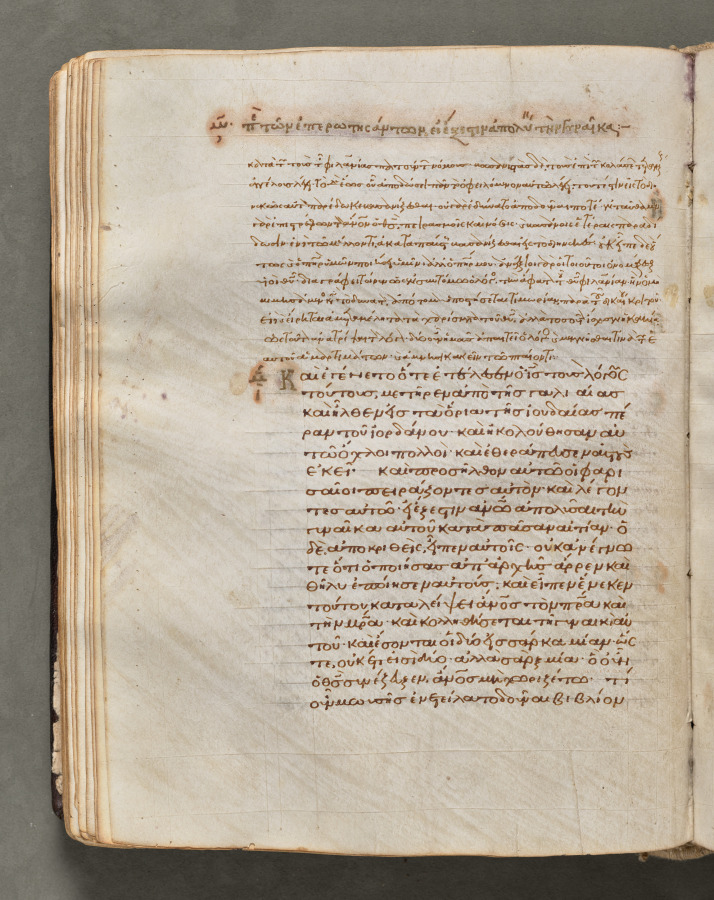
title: Text, folio 83 (verso), from a Gospel Book with Commentaries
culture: Byzantium, Constantinople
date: c. 1000–1100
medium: ink, tempera, and gold on vellum; leather binding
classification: Bound Volume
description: Each of the four gospels in this book opens on a page with brilliantly illuminated borders depicting the author of the text as well as birds-principally peacocks, symbols of the immortality of the soul-and fountains, representing the fountain of life and the salvation of the soul. This volume consists of 428 leaves with texts in Greek. Its level of sophistication suggests that it was probably written and decorated in a monastery in Constantinople.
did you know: Gospel Books were carried in procession through Byzantine churches.